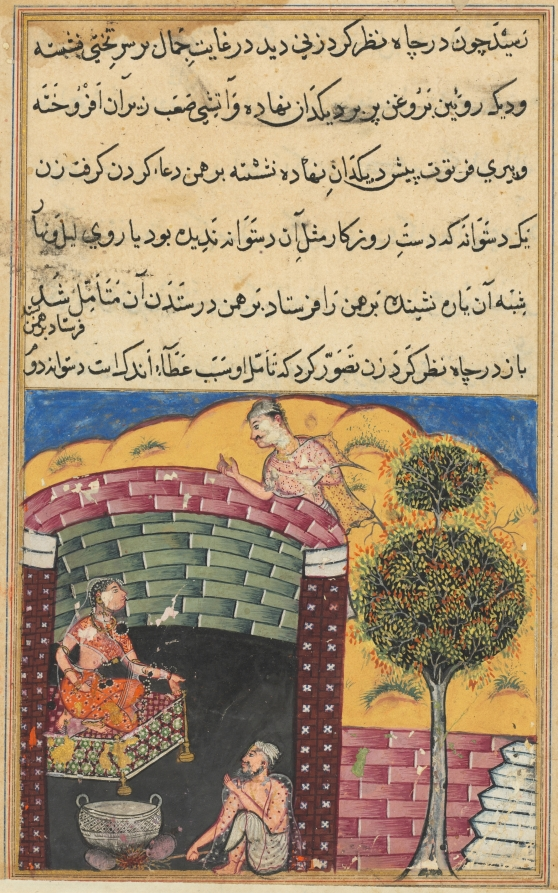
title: The Brahman gambler sees the daughter of the king of the jinns in a pit together with an old man and a cauldron of boiling oil, from a Tuti-nama (Tales of a Parrot: Seventh Night)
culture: Mughal India, court of Akbar (reigned 1556–1605)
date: c. 1560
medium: gum tempera, ink, and gold on paper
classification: Painting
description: A destitute Brahman peers into an open pit. At the bottom, he sees a beautiful woman and her elderly lover, who has stoked the fire beneath the cauldron for nearly eighty years. She gives the Brahman two gold bracelets, which he holds in each hand. The pit is represented in cross-section, allowing the viewers to see the action inside.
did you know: The advanced age of the old man is signaled by his black and white beard.